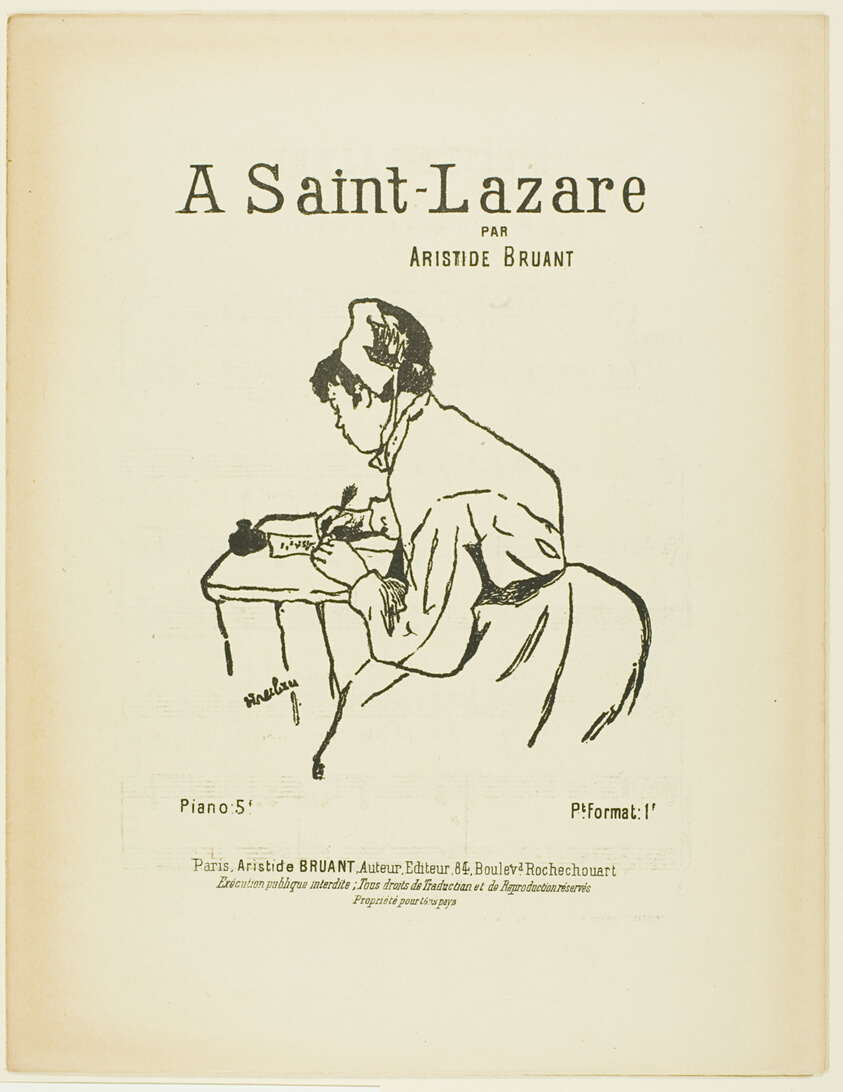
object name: Print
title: À Saint-Lazare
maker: Henri de Toulouse-Lautrec (French, 1864-1901)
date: 1885, later edition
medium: Lithograph in black on tan wove paper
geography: France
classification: lithograph; print; prints and drawing